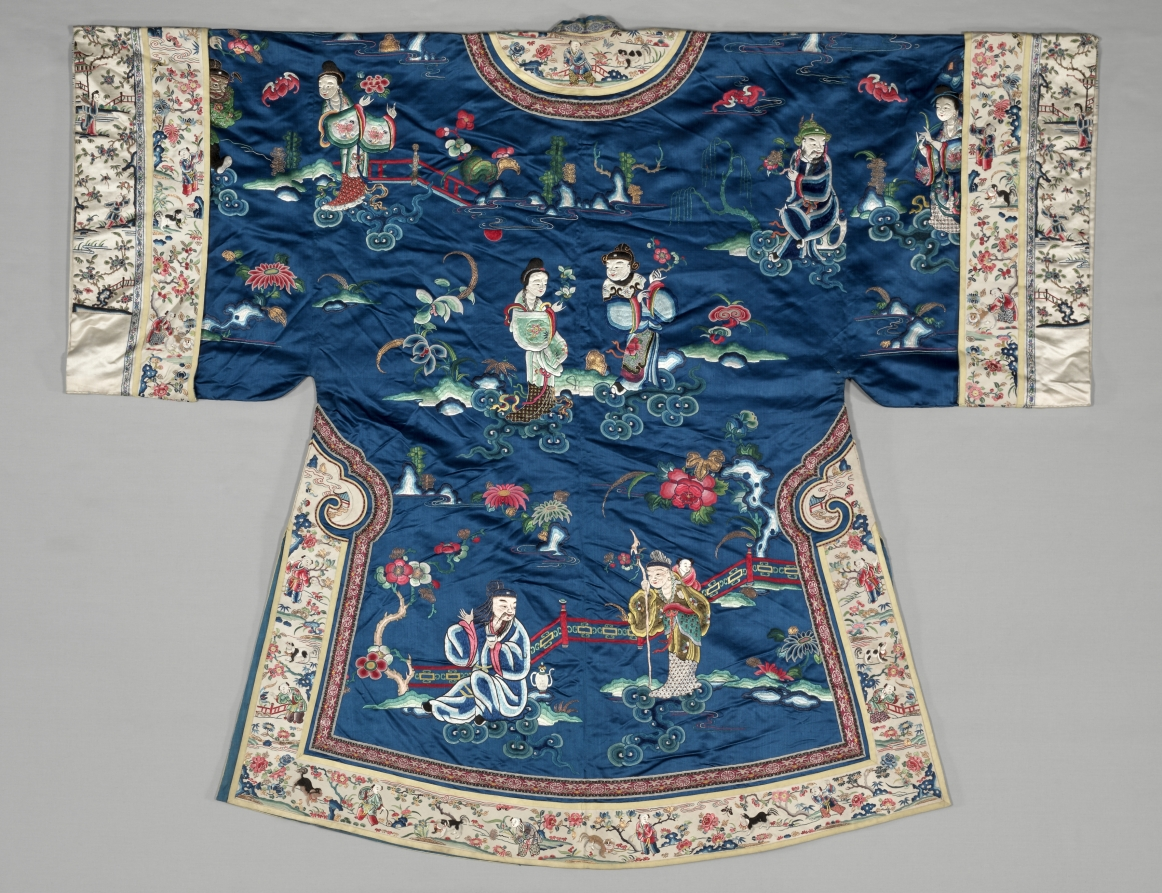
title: Han Woman's Coat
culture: China, Qing dynasty (1644-1911)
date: late 1800s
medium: Silk and gold thread: embroidery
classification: Garment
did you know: The coat's embroidered trim depicts animals and boys.